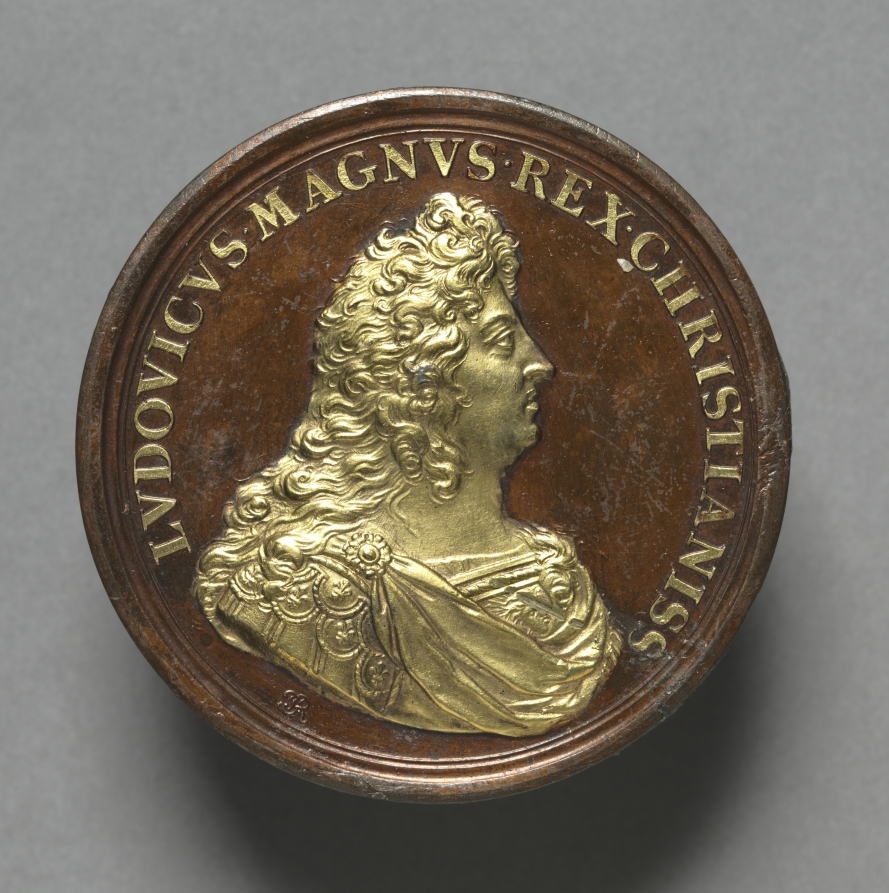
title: Medal Commemorating the Founding of Saarlouis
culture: France, 17th century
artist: Joseph Roettiers (Flemish, 1635–1703)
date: 1688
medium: bronze, partially gilded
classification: Sculpture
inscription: inscribed along circumference: Ludovicus. Magnus. Rex. Christianiss"; inscribed: JR [monogram].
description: Saarlouis is a city in Saarland, Germany, and this medal commemorates the founding of the fortress and city in 1680 by King Louis XIV of France. The establishment of Saarlouis was one of many actions taken by the king to fortify the new border between Germany and France. This particular medal is one of a large series that composes a medallic history of the reign of Louis XIV, issued at various intervals during his reign.